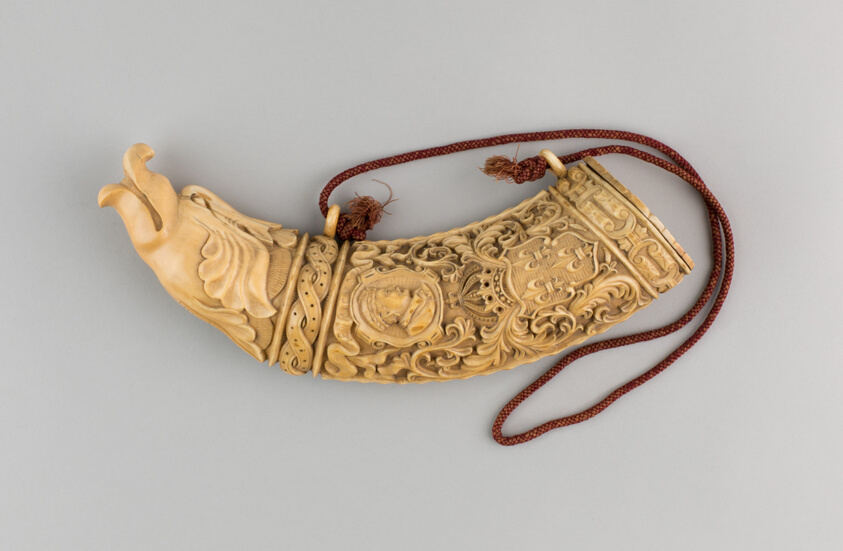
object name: Arms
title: Powder Horn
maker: French, probably Dieppe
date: About 1850-70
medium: Ivory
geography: France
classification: firearm-accessory; arms; arms and armor